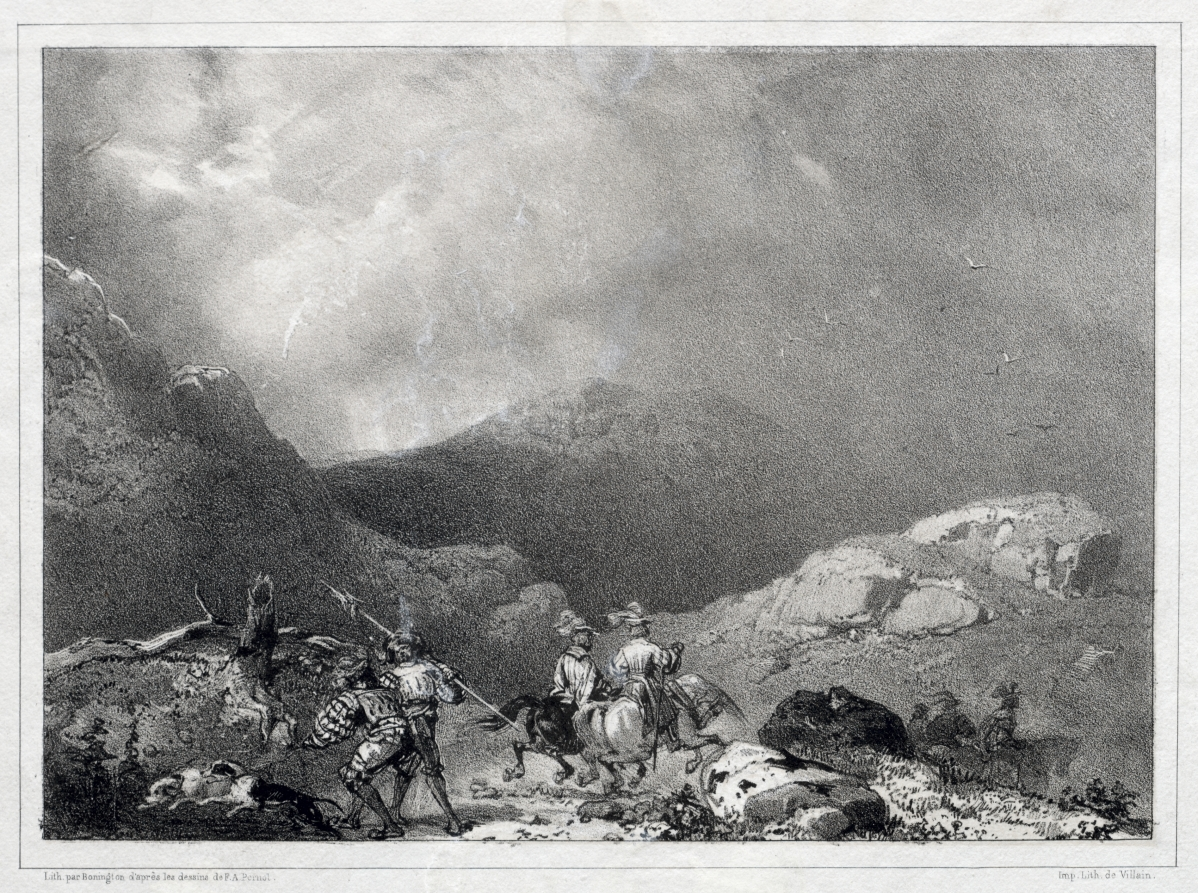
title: Glenfinlas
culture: England, 19th century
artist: Richard Parkes Bonington (British, 1802–1828)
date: 1826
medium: lithograph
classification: Print